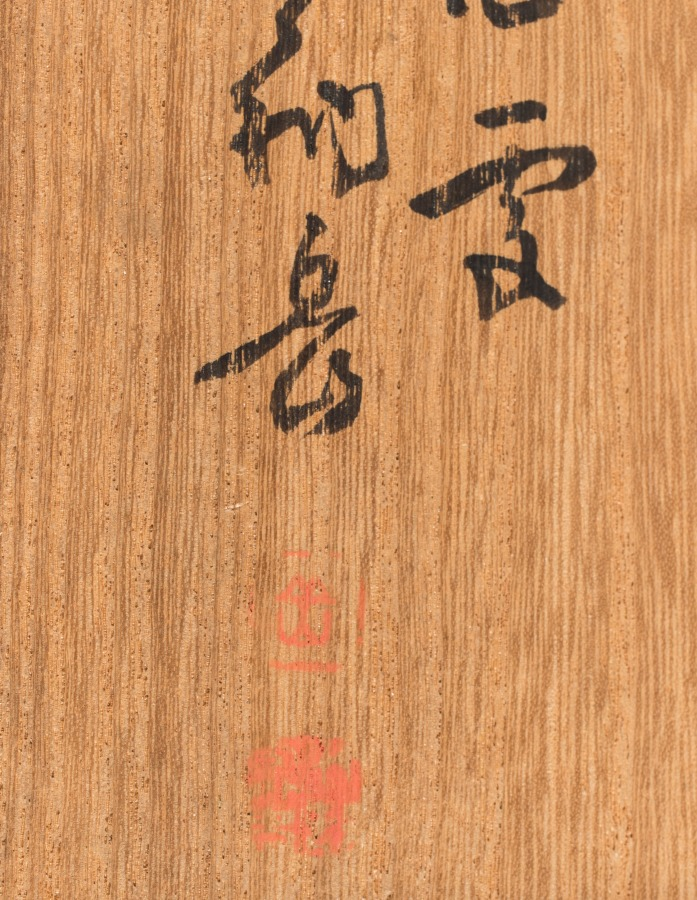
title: Solitary Colors of the Autumn Woods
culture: China, Ming dynasty (1368–1644)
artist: Wang Jianzhang (Chinese, active 1621–1662)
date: first half 1600s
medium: hanging scroll; ink and color on satin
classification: Painting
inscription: Artist's inscription, signature, and 2 seals: Cold frost falls on the fences,/ Solitary colors scatter the maples./ Reciting the chapter of "The Autumn Water,"/ I cannot still the emotion in my old heart. After the style of Fan Hua-yüan [Fan Kuan], Wang Chien-chang . [seals] Wang shih chih yin; Chien-chang. trans. LYSL/HK/WKH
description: Two gentlemen stand outside a thatched hut in a dense forest; some trees have bare branches indicating that the season is early autumn. Wang Jianzhang’s inscribed poem refers to a chapter called “Autumn Water” from Zhuangzi, a famous Daoist text written in the 3rd century BC: "Cold frost falls on the fences, / Solitary colors scatter the maples. / Reciting the chapter of “The Autumn Water,” / I cannot still the emotion in my old heart." Wang Jianzhang lived through the collapse of the Ming dynasty (1368–1644) and the rise of the Qing dynasty (1644–1911), when China was governed by the Manchus, an ethnic people from Manchuria who were traditionally viewed as “barbarians” by the Chinese. The poetic reference to Zhuangzi’s “Autumn Water” seems to discreetly convey Wang’s feelings about his country being taken over. “Autumn Water” was about learning to take steps in the foreign way, but not acquiring a foreign tongue. Perhaps Wang was lamenting his conflicted situation. For survival he had to adapt to the new political and social climate, while still trying to maintain his own identity and Chinese traditions.